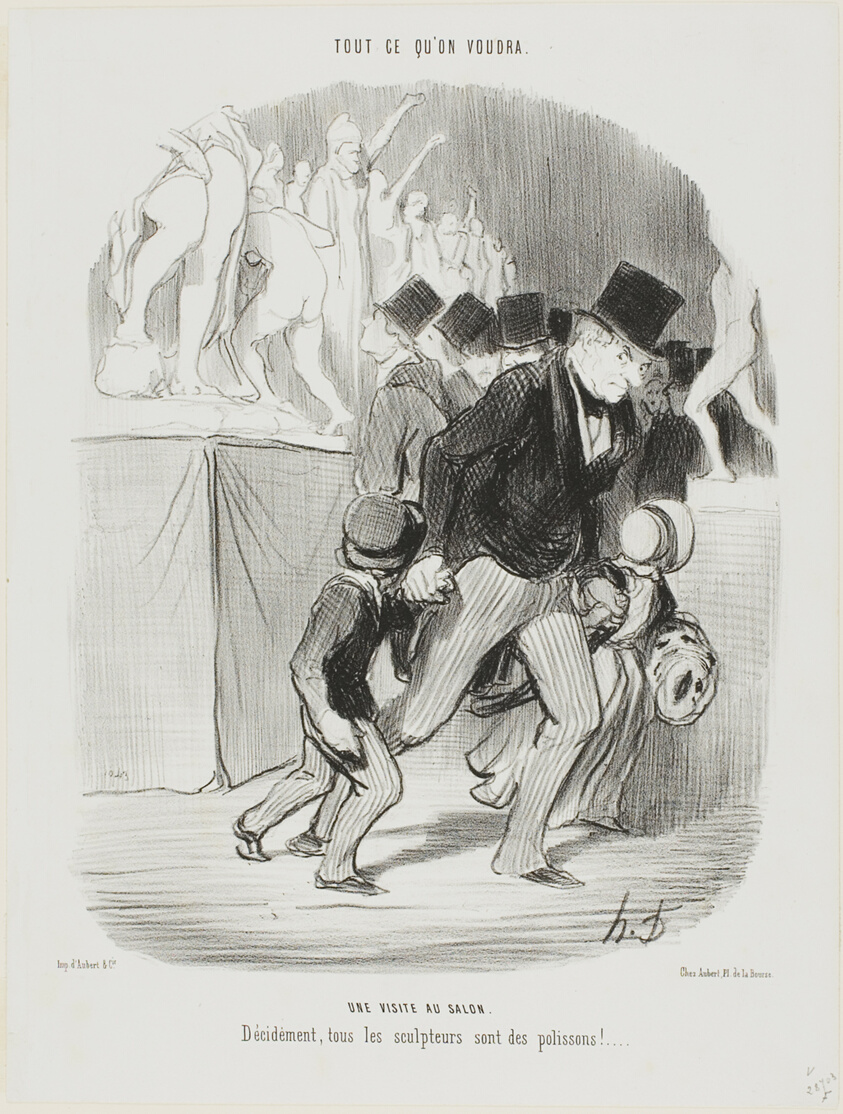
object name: Print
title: A Visit to the Salon. Obviously all the sculptors are a naughty bunch, plate 1 from Tout Ce Qu'on Voudra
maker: Honoré Victorin Daumier; French, 1808-1879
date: 1847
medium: Lithograph in black on white wove paper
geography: France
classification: lithograph; print; prints and drawing